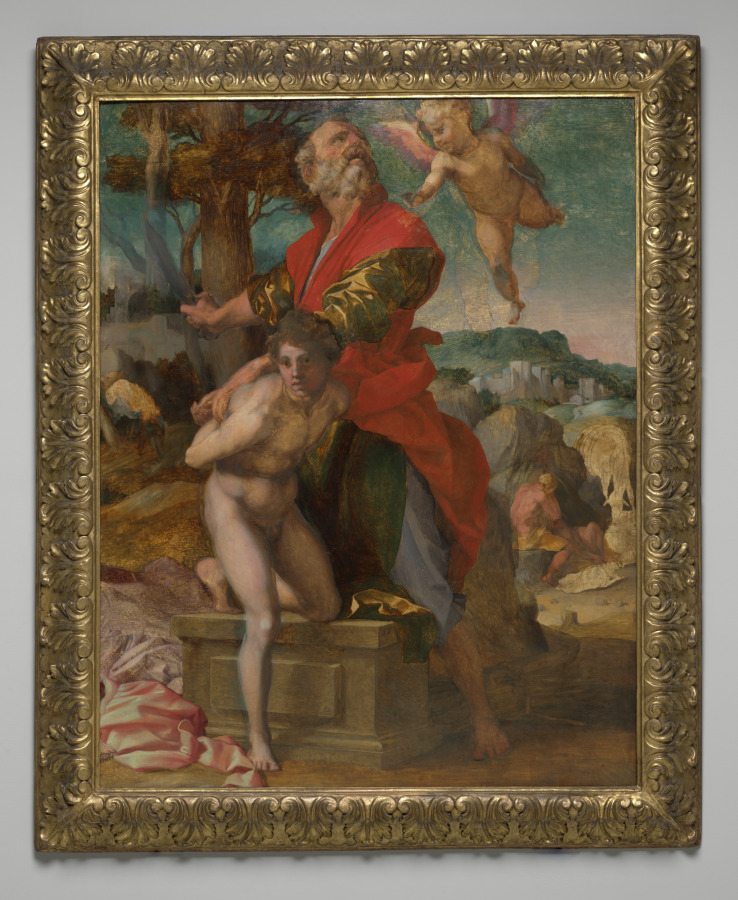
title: The Sacrifice of Isaac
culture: Italy, Florence, 16th century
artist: Andrea del Sarto (Italian, 1486–1530)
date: c. 1527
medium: oil on wood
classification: Painting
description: In this dramatic test of faith from the Old Testament book of Genesis, Abraham agrees to slay his son Isaac on God’s command. As Abraham raises the knife, an angel suddenly appears to halt the sacrifice. This work gains its power from the complex expressions of father and son, combining grief, strength, resignation, fear, and realization in their faces and bodies, the latter inspired by ancient sculpture and Michelangelo. Andrea del Sarto never finished this painting, and it lays bare his working methods. He transferred the design to the panel from a drawing, reinforcing the chalk with painted lines—best seen in the donkey at the far right. He then worked over the whole panel at once with thin, brushy veils of color, letting him alter the composition while painting—especially evident in the angel, Isaac’s body, and Abraham’s head.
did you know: The angel has two visible sets of legs, showing the artist’s revision of the composition.